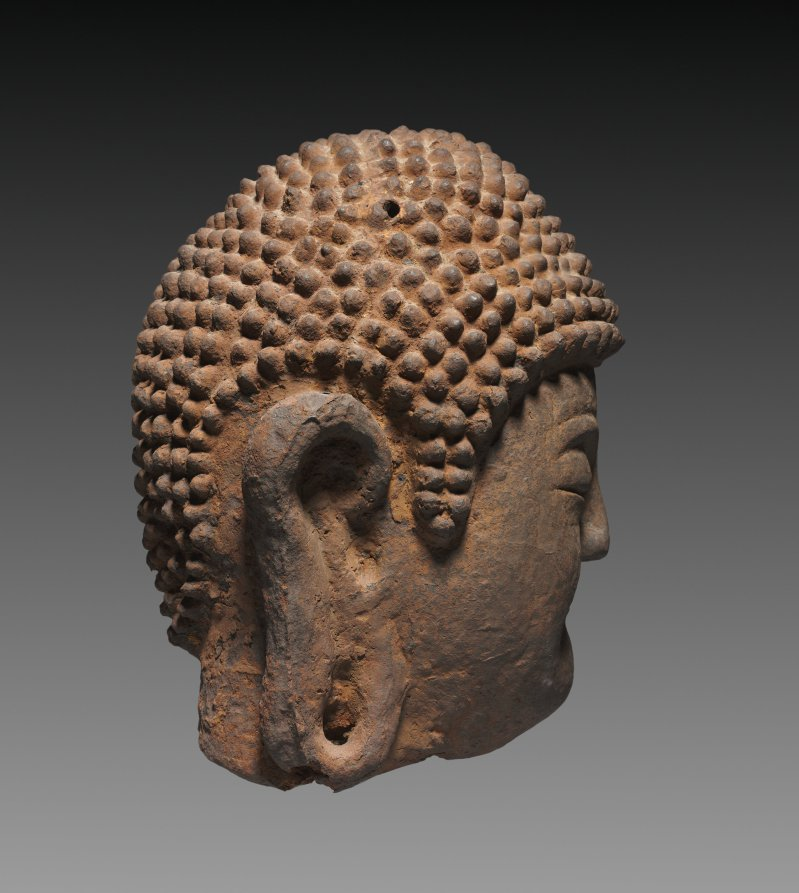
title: Buddha Head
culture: Korea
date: 1900s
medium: cast iron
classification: Sculpture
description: This Buddha has a soft and gentle smile, a typical attribute of Korean images of the Buddha. His plum cheeks and soft smile remind us of his childlike purity while his nearly closed eyes show him in a moment of meditation. The empty divot in the middle of the forehead would originally have contained a jewel symbolizing the light emanating from the Buddha. His head is topped with a profusion of snail-shell curls and an ushnisha, a mound symbolizing the Buddha’s enlightenment.